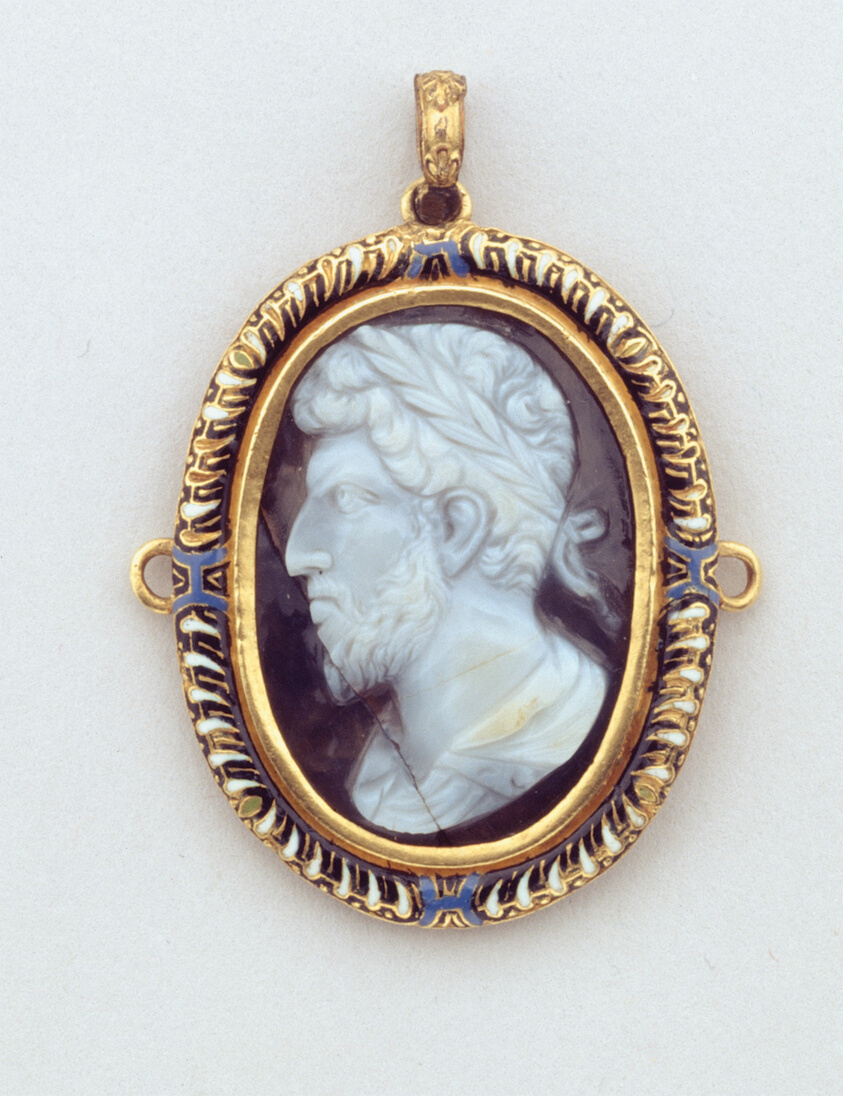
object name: Costume and Accessories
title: Hat Badge with a Cameo of a Laureate Head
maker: Italian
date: c. 1550-c. 1600 with later modifications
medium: Agate, gold, and enamel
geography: Northern Italy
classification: pendant (jewelry); jewelry; european decorative arts; costume